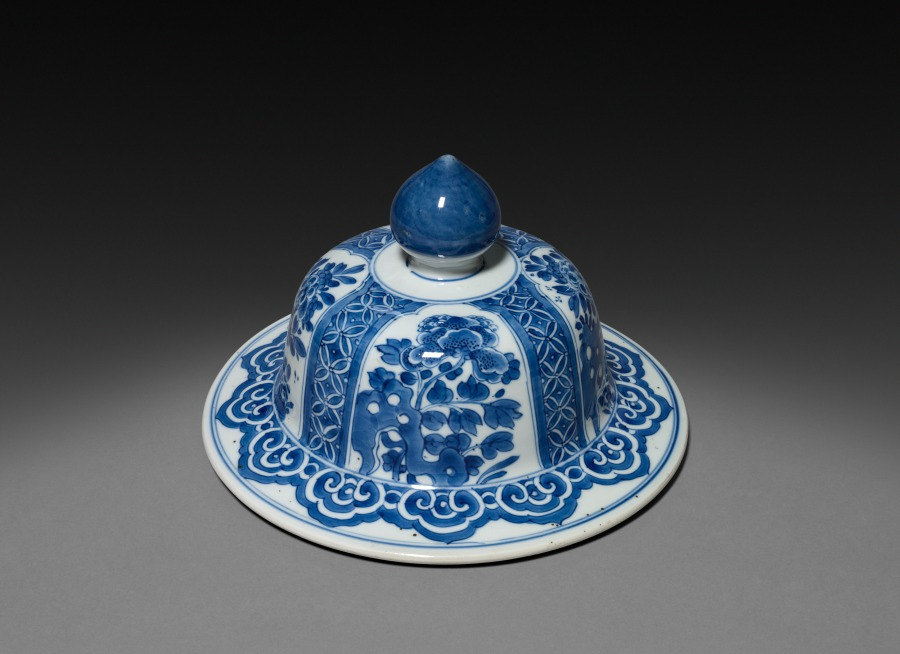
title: Vase with Cover (lid)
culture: China, Jiangxi province, Jingdezhen kilns, Qing dynasty (1644–1911), Kangxi reign (1662–1722)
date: 1662–1722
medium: porcelain with underglaze blue decoration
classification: Ceramic